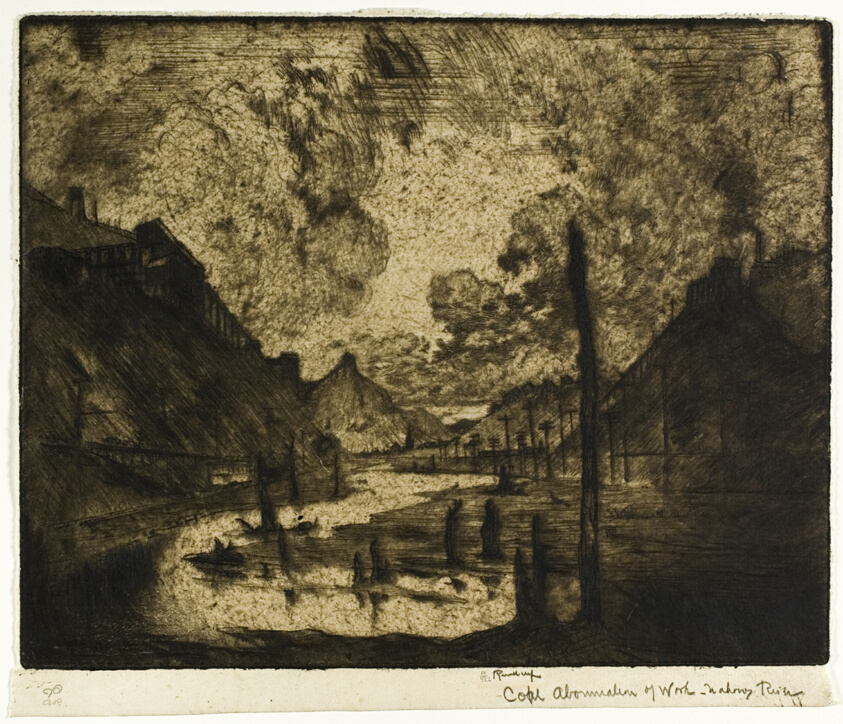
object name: Print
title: Coal—Abomination of Work, Mahanoy River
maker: Joseph Pennell (American, 1857-1926)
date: 1908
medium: Drypoint on ivory laid paper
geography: United States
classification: drypoint; print; prints and drawing